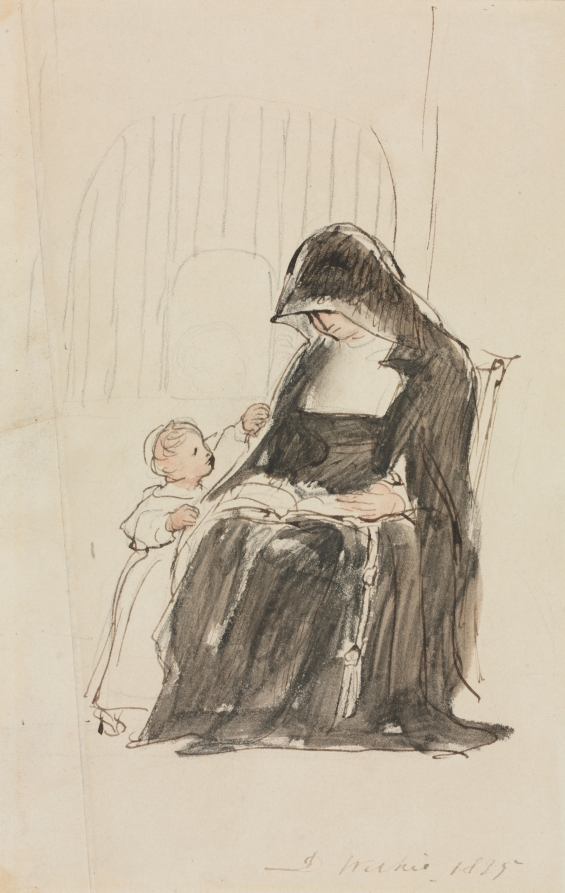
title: Nun Reading to a Child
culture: England, 19th century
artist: David Wilkie (British, 1785–1841)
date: 1835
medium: pen and ink over graphite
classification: Drawing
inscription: Signed in brown ink